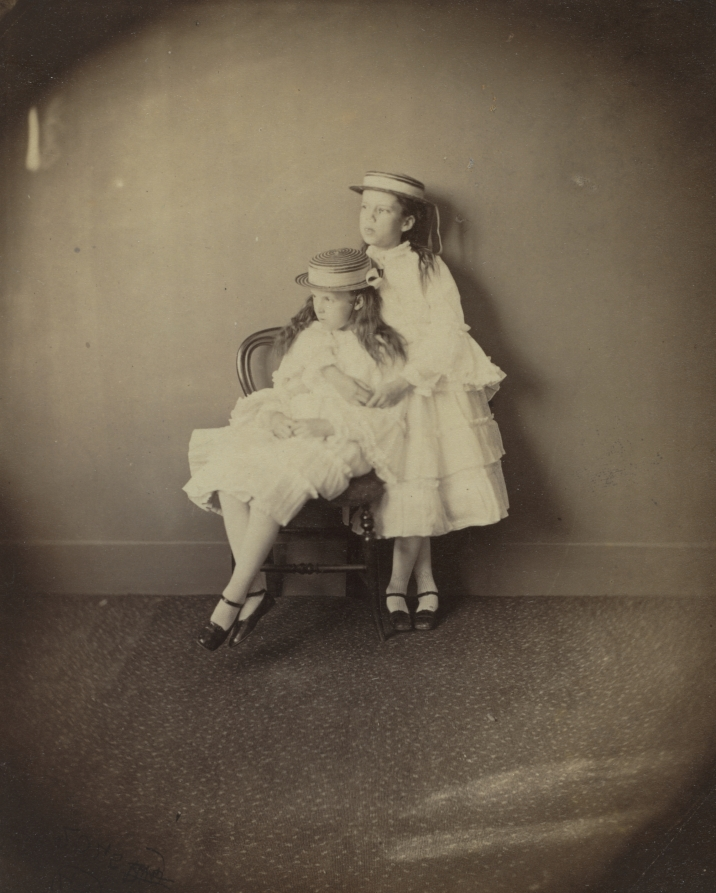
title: Julia and Ethel Arnold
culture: England, 19th century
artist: Lewis Carroll (British, 1832–1898)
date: 1872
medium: albumen print from wet collodion negative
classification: Photograph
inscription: Scratched into negative: "48 [circled]"; "2045" [and another word or symbol - unclear]; written in pencil on verso: "Arnold"; in ink on verso: "2045"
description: Best known as the author of Alice’s Adventures in Wonderland, mathematician, lecturer, and church deacon Charles Dodgson was an avid amateur photographer. His subjects were wide ranging but he has become best known for his portraits of children, which avoid the formal, formulaic quality of studio portraiture of the time. Julia was 10 and Ethel was 6 when this photo was taken in Dodgson’s rooftop studio at Christ Church College, Oxford, on June 15, 1872. Ethel reminisced 57 years later that the times spent with Dodgson were “oases of brightness in a somewhat gray and melancholy childhood.” She also remembered that “for a nervous child . . . to keep still for forty-five seconds at a time was no mean ordeal.”